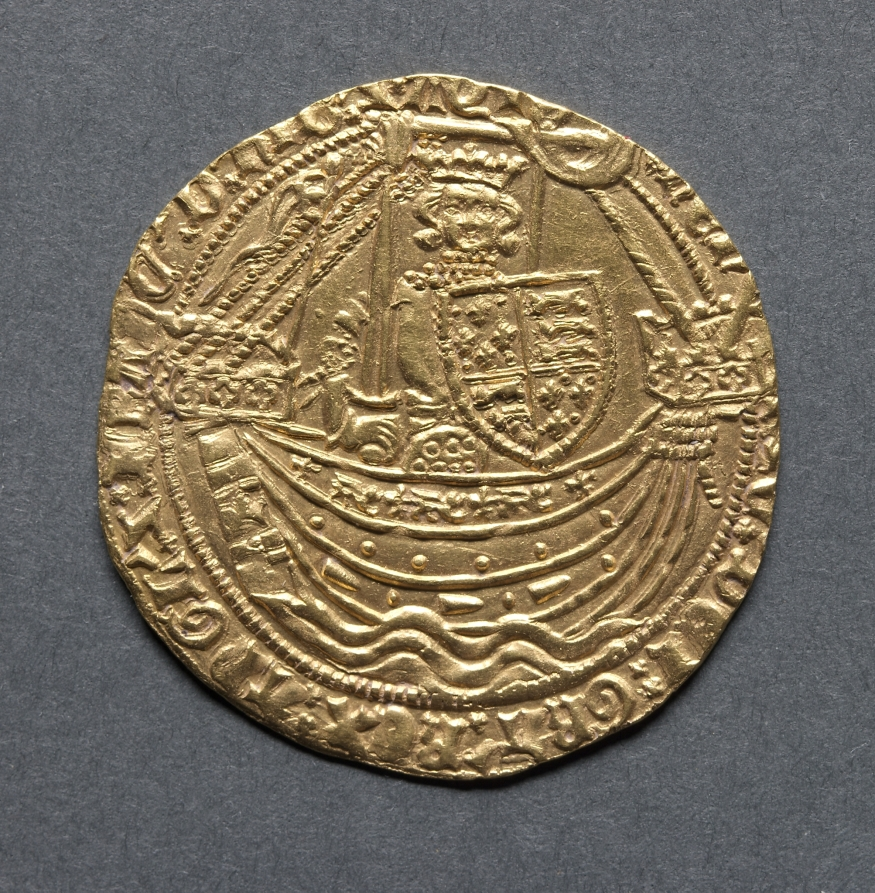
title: Noble: Henry IV Standing in Ship with Shield of Arms (obverse); Ornamental Cross with Lis Terminals (reverse)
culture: England, Henry IV, 1399-1413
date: 1399–1412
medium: gold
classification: Coins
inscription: HENRIC DI GRA REX ANGL S FRANC DNS HIB Z